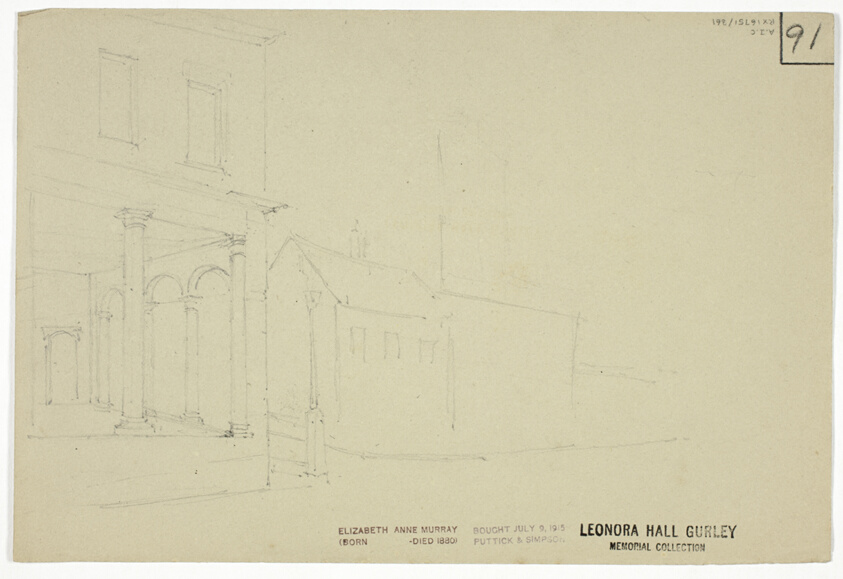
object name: Drawing and Watercolor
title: Young Girl Pouring Tea and Profile Sketch (recto), and Sketch of Italian City Street (verso)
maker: Elizabeth Murray (English, c. 1815-1882)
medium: Graphite and red chalk with traces of white chalk (recto), and graphite (verso), on gray wove paper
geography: England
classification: graphite; drawings (visual works); prints and drawing